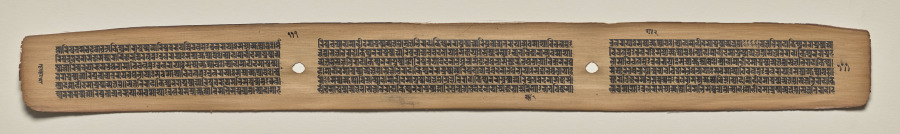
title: Text, Folio 111 (verso), from a Manuscript of the Perfection of Wisdom in Eight Thousand Lines (Ashtasahasrika Prajnaparamita-sutra)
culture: Eastern India, Bihar, Vikramashila Monastery. Painting: Nepal, Kathmandu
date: Sunday, September 14, 1119 (year 239 of the Newar Samvat in the month of Ashvina)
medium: gum tempera and ink on palm leaves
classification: Painting